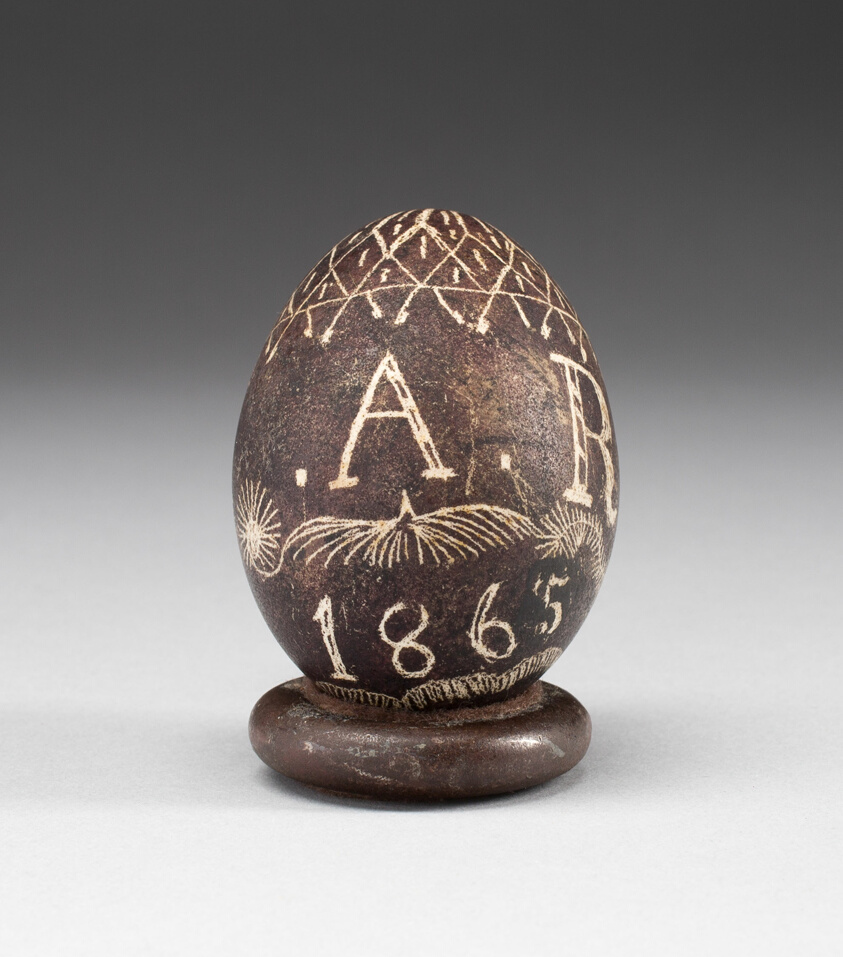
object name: Decorative Arts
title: Egg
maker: Artist unknown (American, 19th century)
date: 1865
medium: Colored egg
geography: United States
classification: american decorative arts; american arts; decorative arts